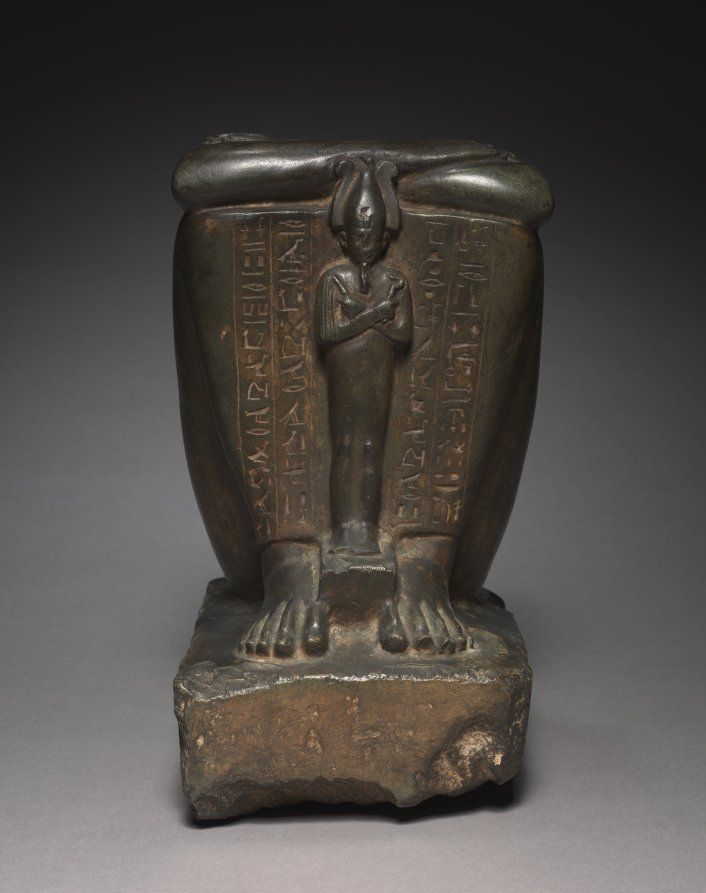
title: Block Statue of the Royal Acquaintance, Horwedja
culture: Egypt, Late period (715–332 BCE), Dynasty 26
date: 664–525 BCE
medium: graywacke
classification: Sculpture